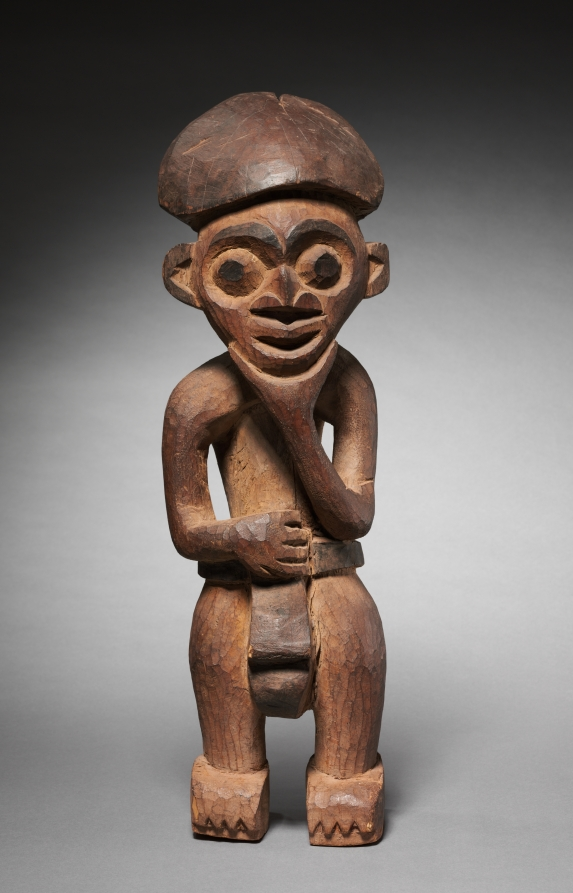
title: Royal Retainer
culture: Equatorial Africa, Cameroon, Bamum, early 20th century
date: early 1900s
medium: wood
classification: Sculpture